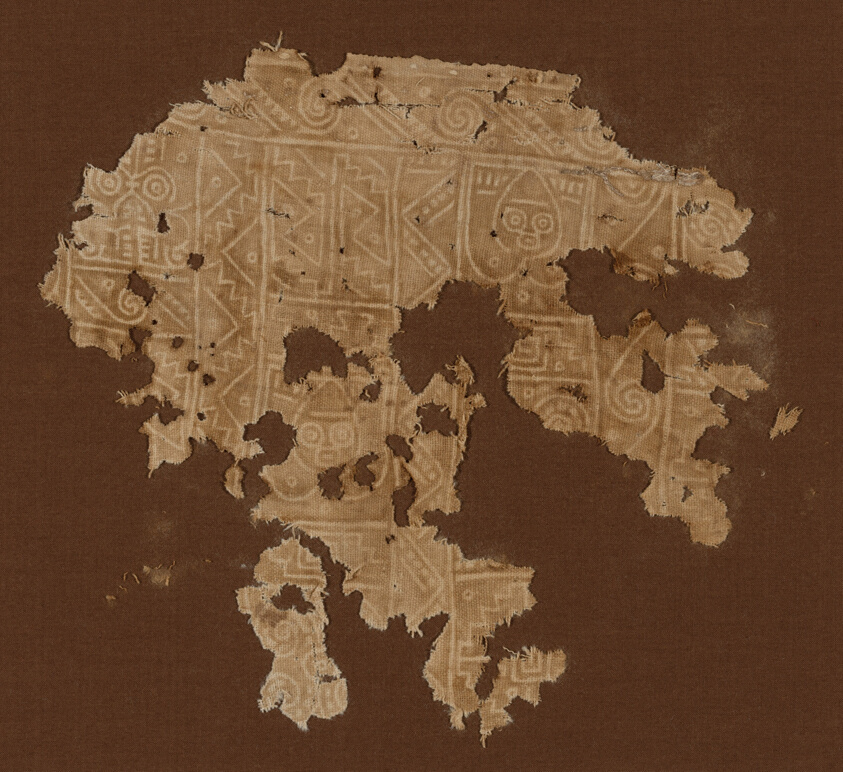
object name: Textile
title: Fragment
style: chancay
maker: Chancay (Central coast, Peru)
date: A.D. 1000/1476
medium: Cotton, predominant warp, plain weave; painted.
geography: Peru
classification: textile; weaving; weaving - printed